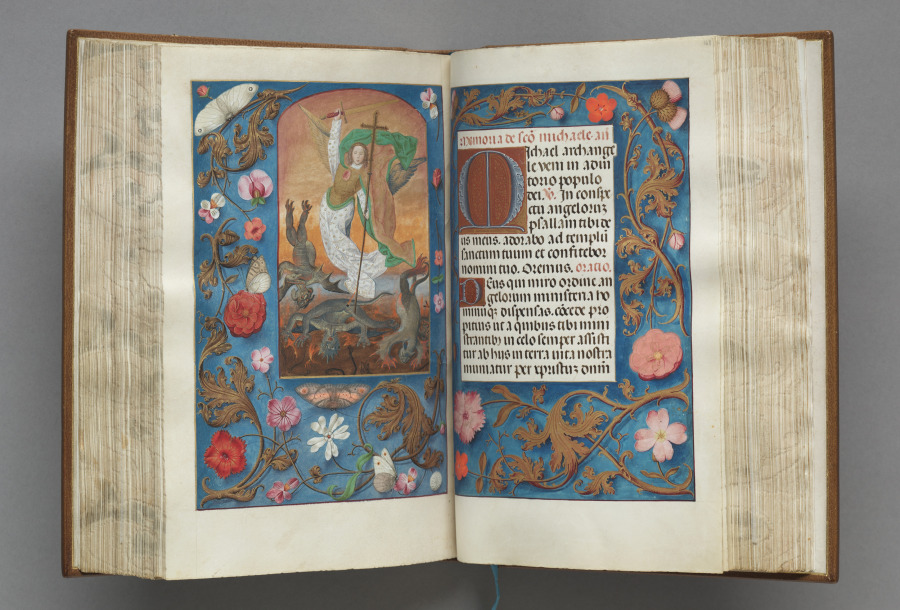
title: Hours of Queen Isabella the Catholic, Queen of Spain: Fol. 167v, St. Michael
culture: Flanders, Ghent and Bruges, late 15th century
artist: Master of the First Prayerbook of Maximillian (Flemish, c. 1444–1519)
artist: and Associates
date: c. 1500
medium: ink, tempera, and gold on vellum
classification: Bound Volume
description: This manuscript was illuminated by a circle of at least five highly organized manuscript painters active in the Flemish cities of Ghent and Bruges. The principal illuminator was Alexander Bening, who painted the majority of the book's miniatures. Manuscripts produced by this circle of artists are renowned for the decoration of their borders, which typically feature a rich variety of realistically-painted flowers, birds, and butterflies. This prayer book, called a book of hours, was intended not for a cleric, but for the private devotions of a lay person-in this case, Isabella the Catholic, Queen of Spain (1451-1504). Isabella's coat of arms embellishes the book's frontispiece. It is unlikely that the book was commissioned by the Queen herself; rather, she probably received it as a diplomatic gift from someone courting her patronage, perhaps Cardinal Francisco Jimenez de Cisneros. A Franciscan friar, Jimenez was dependent upon Isabella for his advancement, first to the post of Queen's confessor in 1492, and then to Archbishop of Toledo in 1495.